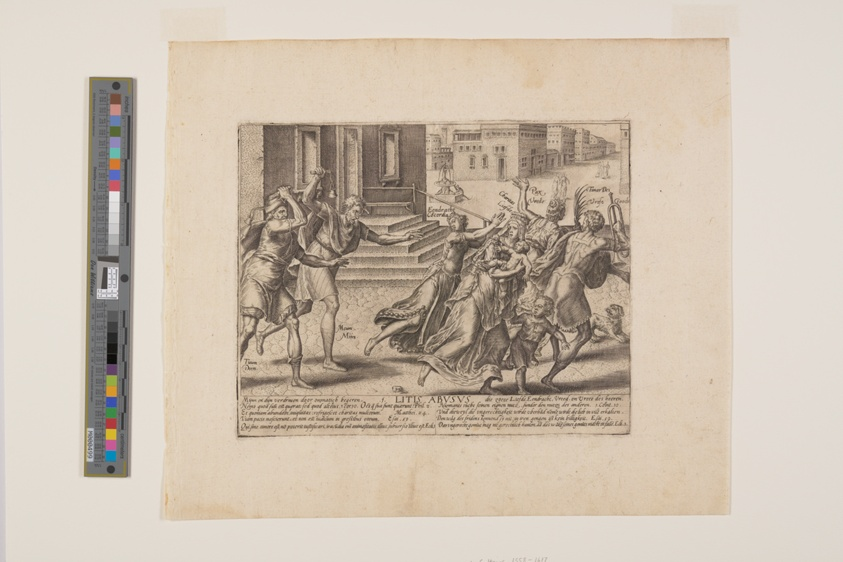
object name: Print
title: To Each His Own, from Litis Abusus (The Abuses of the Law)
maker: Hendrick Goltzius (Dutch, 1558–1617)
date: c. 1576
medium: Engraving on ivory laid paper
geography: Netherlands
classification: print; paper; prints and drawing; engraving